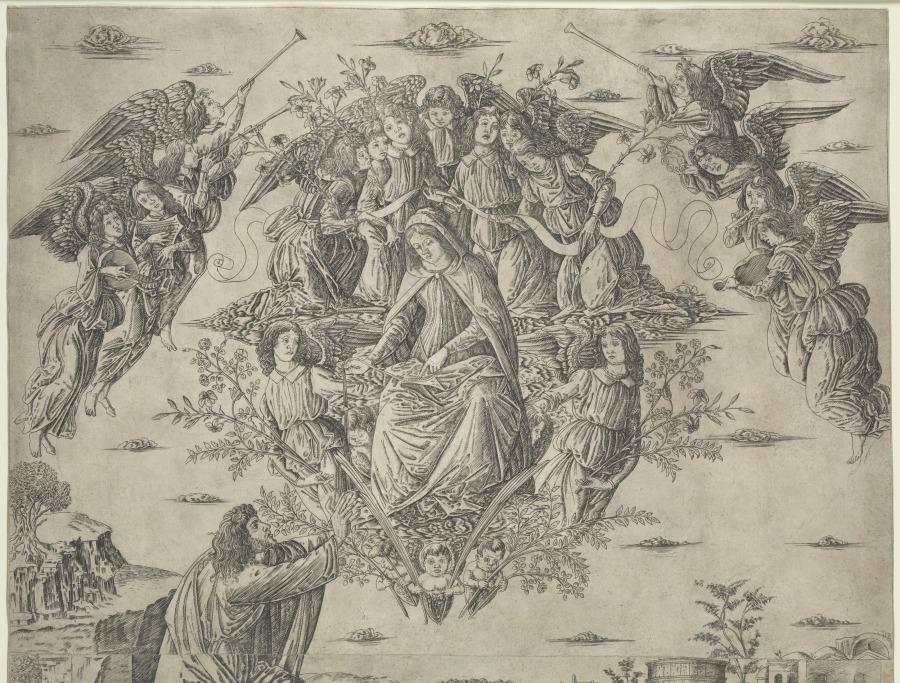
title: The Assumption of the Virgin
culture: Italy, Florence, 15th century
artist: Francesco Rosselli (Italian, 1448-about 1513)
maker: after Sandro Botticelli (Italian, 1444/45–1510)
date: c. 1495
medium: engraving printed on two sheets from two plates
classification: Print